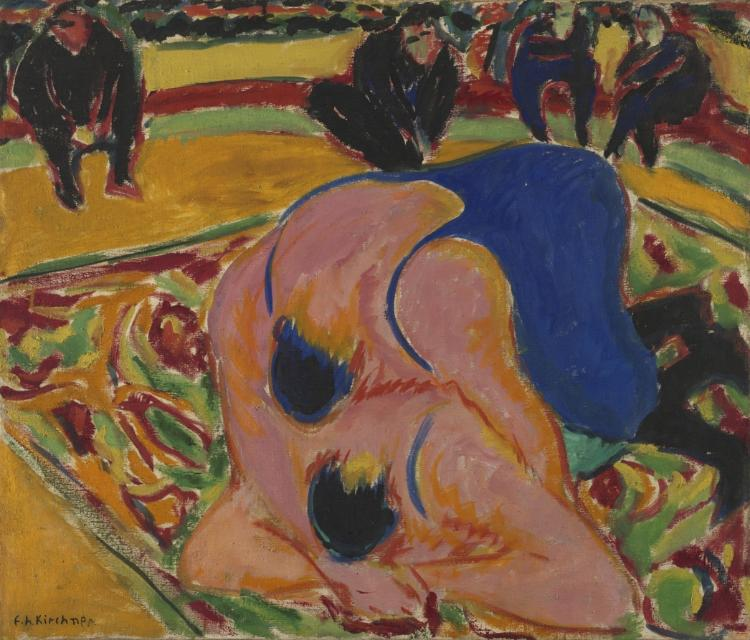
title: Wrestlers in a Circus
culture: Germany, 20th century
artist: Ernst Ludwig Kirchner (German, 1880–1938)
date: 1909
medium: oil on canvas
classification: Painting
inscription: signed lower left: E. L. Kirchner.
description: Locked in a dangerous embrace, beefy wrestlers writhe on a brightly colored mat. Famous for his scenes of urban life, Kirchner uses loose brushstrokes to capture the blur of bodies in motion. Imagine watching this intense match, surrounded by screaming spectators.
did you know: During the 1930s, 639 works by Kirchner were removed from German museums and either destroyed or sold to foreign collectors and museums. The year after the Nazis organized the Degenerate Art exhibition in Munich, Kirchner committed suicide.